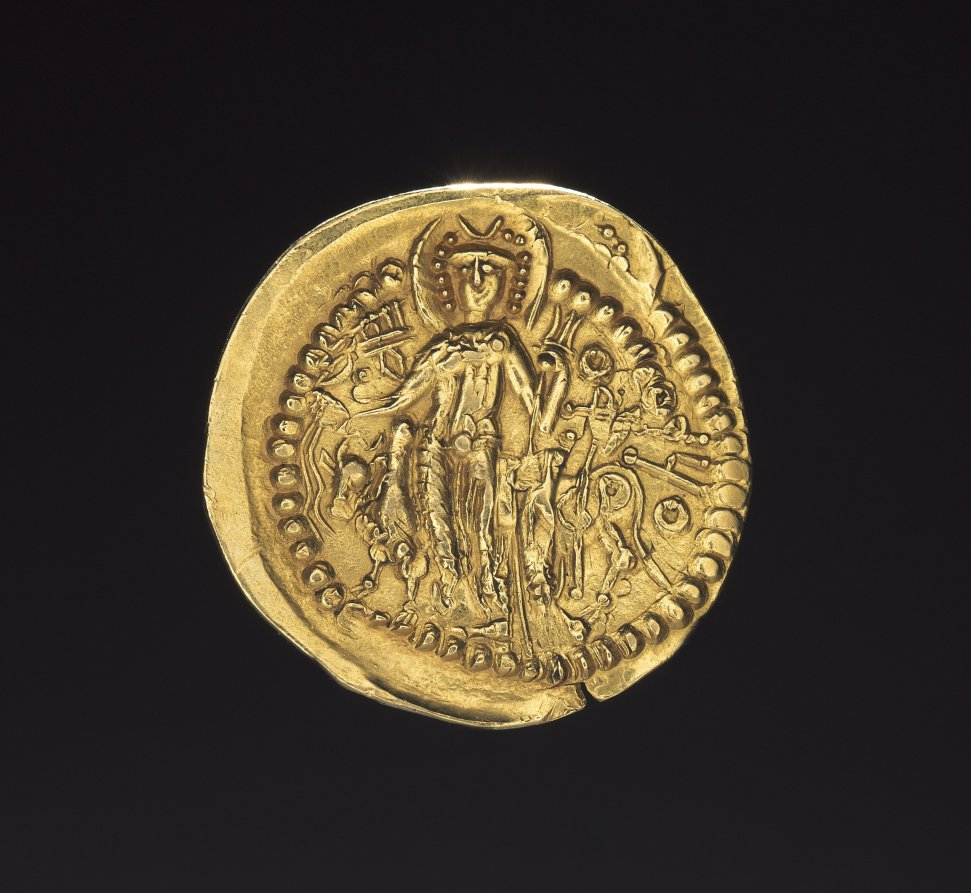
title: Golden Dinar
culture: India, Kushan, Vasudeva II (c. 275–300 CE)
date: 200s CE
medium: gold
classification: Coins